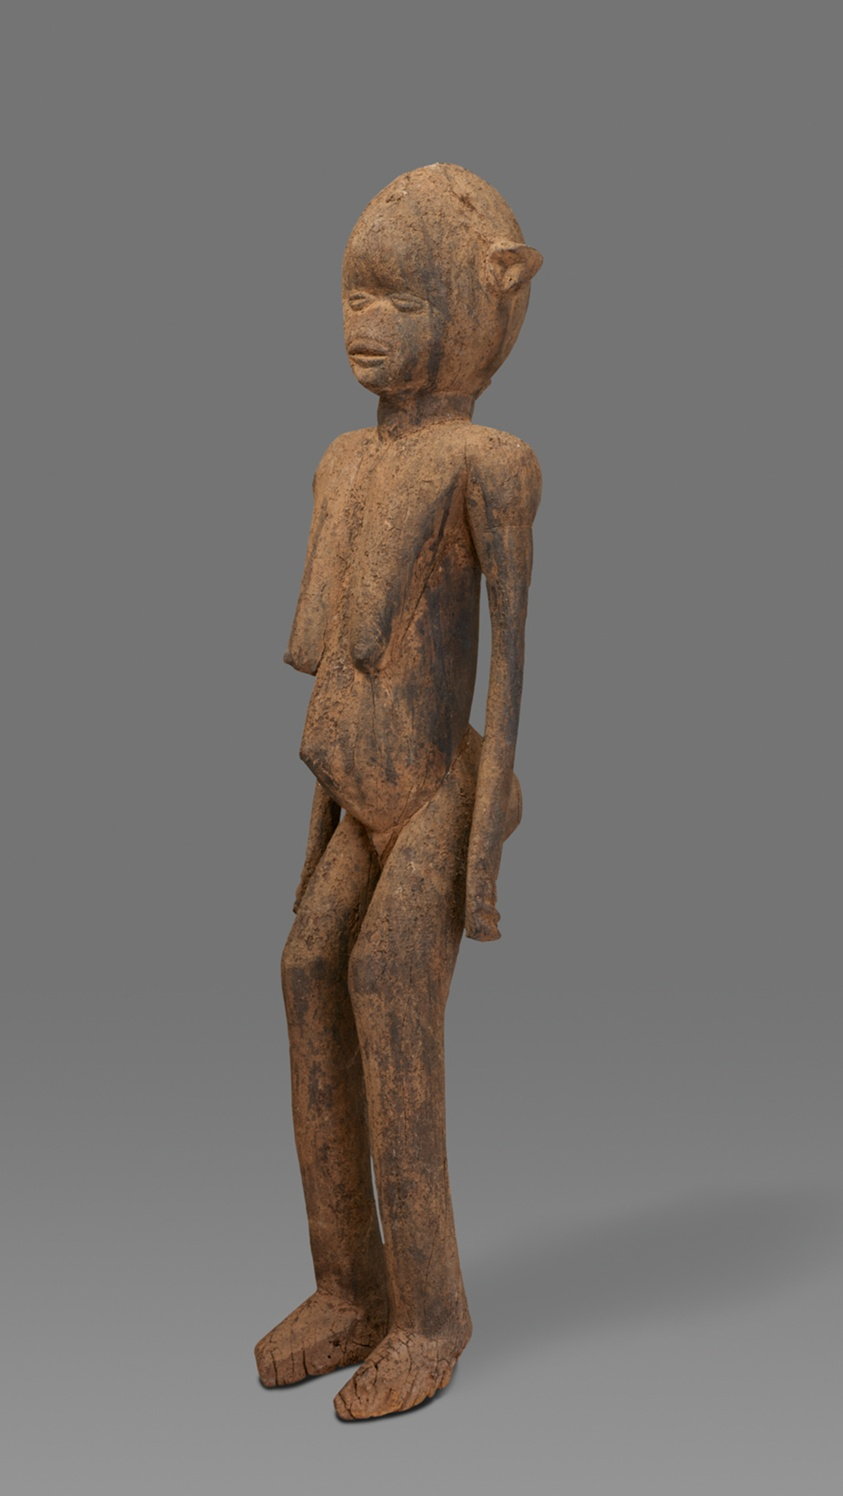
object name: Sculpture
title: Female Figure (Bateba Phuwe)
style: lobi, Arts of Africa, african Art, Northern Africa and the Sahel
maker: Lobi; Burkina Faso; Northern Africa and the Sahel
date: Late 19th or early 20th century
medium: Wood and sacrificial material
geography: Burkina Faso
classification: sculpture; wood; arts of Africa; african art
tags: figures (representations)